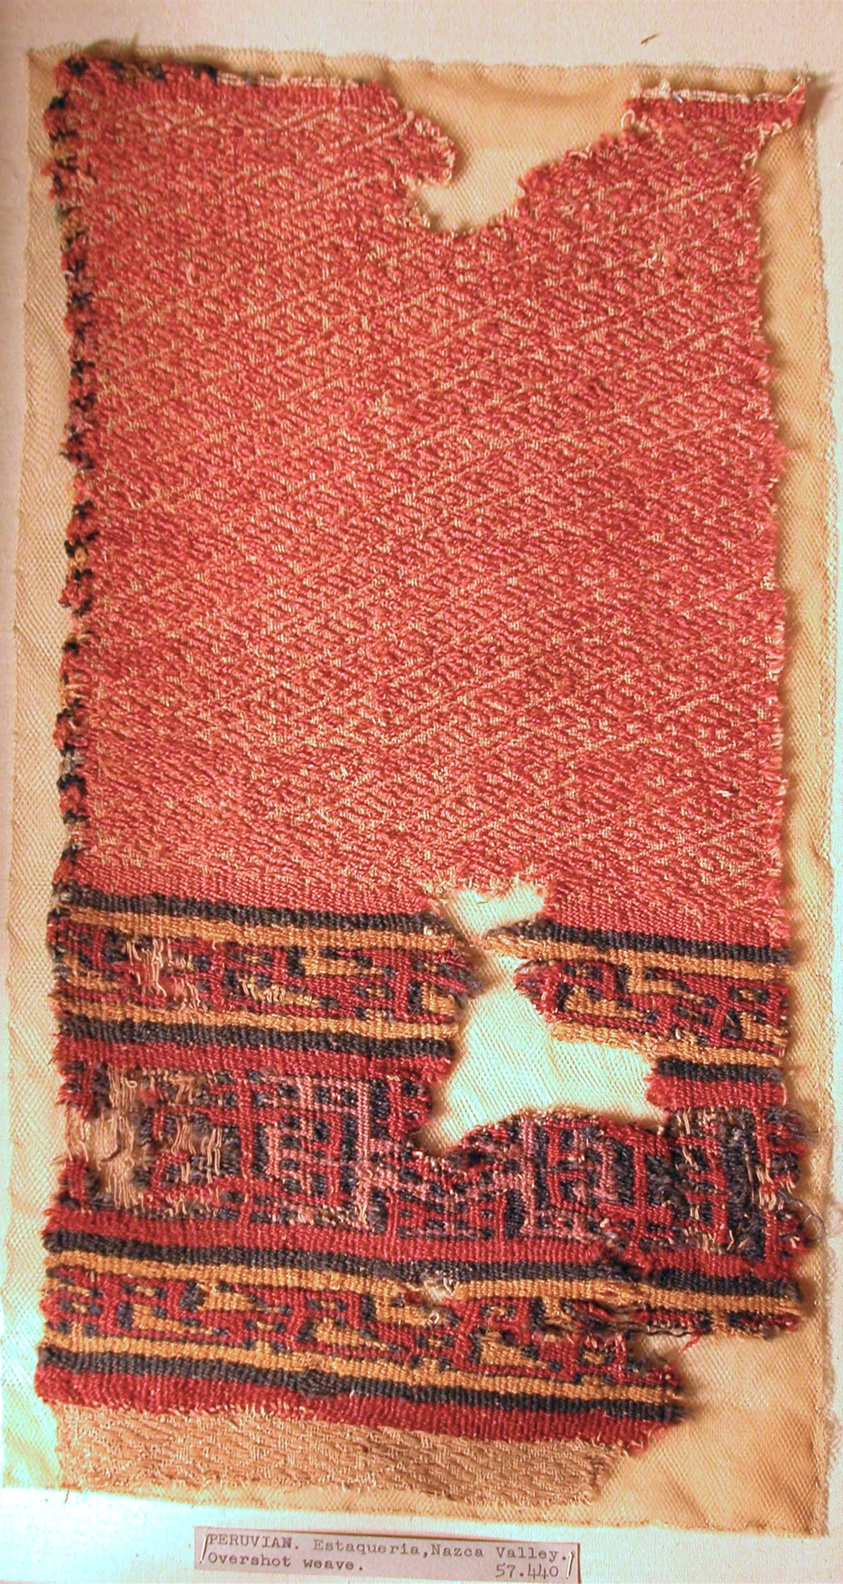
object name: Textile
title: Fragment (Shawl)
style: nazca, early intermediate period, Pre-Columbian, americas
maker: Ica (Peru, south coast, Nazca Valley, Estaqueria)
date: A.D. 1000/1532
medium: cotton and camilid wool, plain weave with supplementary patterning wefts; cotton and camilid wool, single interlocking tapestry weave (paired warps); and cotton, plain weave with supplementary patterning wefts; edged with camilid wool in cross knit loop stitches; left selvage present: wefts turn on paired weft selvage cord; heading present: three heading cords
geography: Peru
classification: textile; weaving